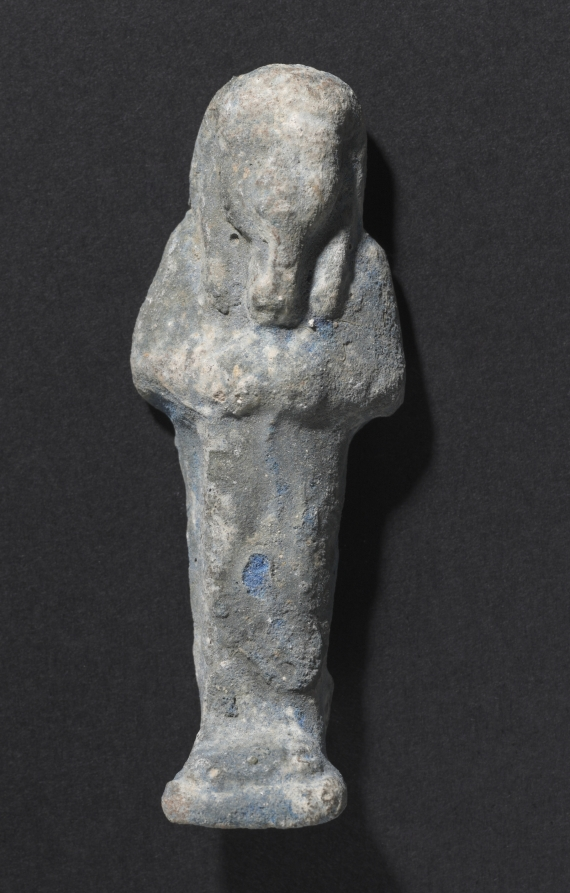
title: Shawabty of Ditamenpaankh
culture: Egypt, Late period (715–332 BCE), Dynasty 25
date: 715–656 BCE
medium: terracotta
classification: Funerary Equipment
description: High demand for shawabtys in the Late Period, a time when as many as 400 or more shawabtys were placed in the tomb with the deceased, gave rise to a specialized container for storing them: the shawabty box. This example is inscribed for the lady of the house, Ditamenpaankh, and was probably one of a pair originally made for her. The single-masted boat on the box's lid is perhaps an allusion to the pilgrimage of the deceased to the holy city of Abydos, the cult city of Osiris, king of the dead. The shawabtys inside are crude, mass-produced examples cast in an open mold. Made of terracotta, their blue paint imitates more costly shawabtys made of faience. As for the shawabty spell, it has been removed from its traditional location on the shawabty's front and relocated onto the sides of box, where it needed only to be written once, thus expediting production.